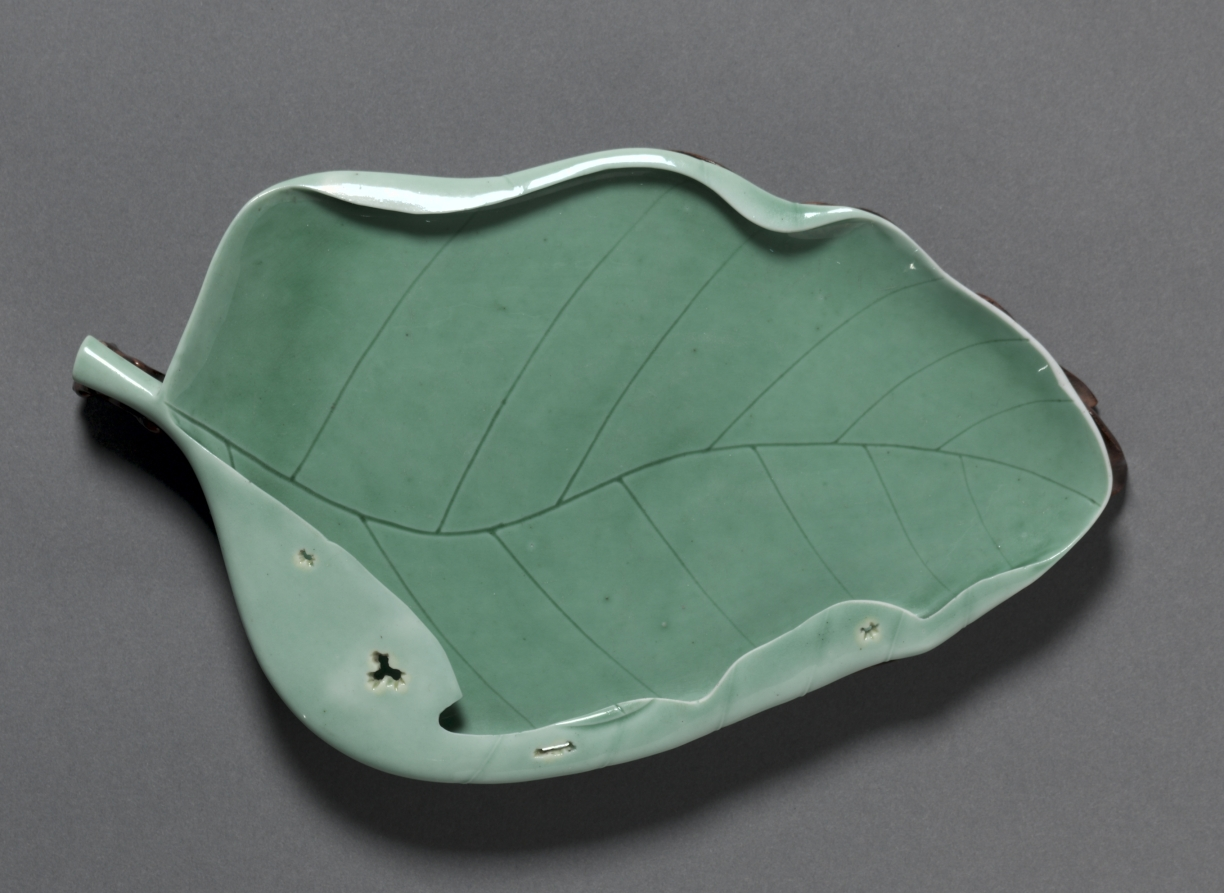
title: Brush Washer in Shape of a Leaf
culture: China, Jiangxi province, Jingdezhen, Qing dynasty (1644-1911), Yongzheng reign (1723-1735)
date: 1723–35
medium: porcelain with camellia-leaf green glaze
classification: Ceramic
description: The leaf-shaped brush washer came with a carved wooden stand that was made separately. It reflects how the object was previously used, displayed, and appreciated.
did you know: The potter detailed the edge of this plantain leaf with holes to make it appear as if a worm had snacked on it.